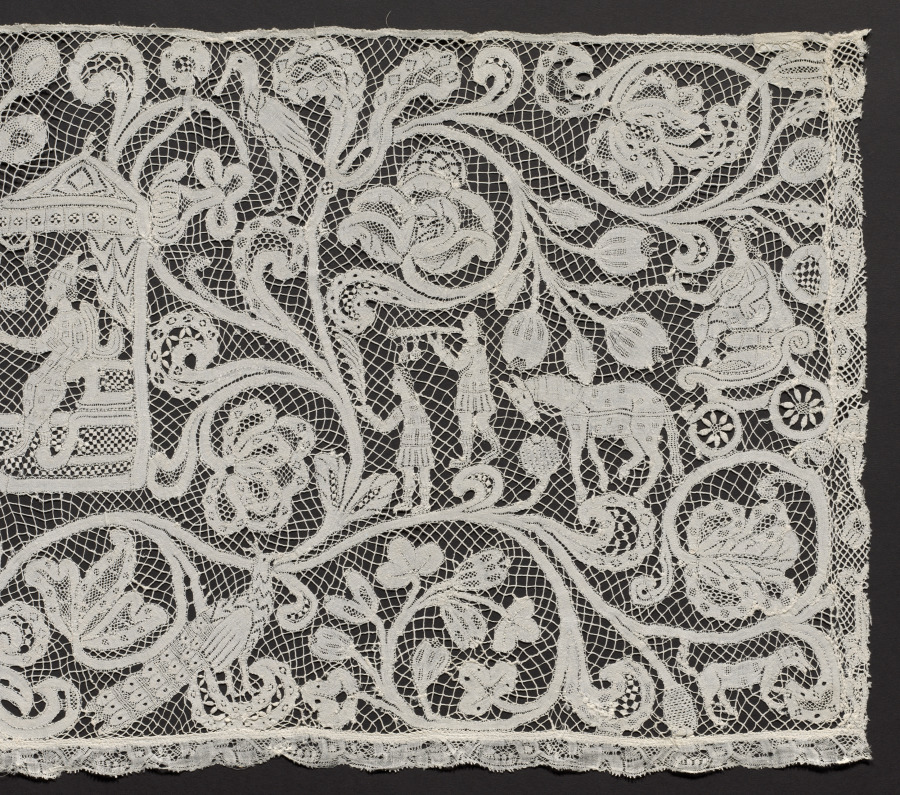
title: Lace Flounce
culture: Italy, Milan(?)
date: 1750–99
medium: Linen: bobbin lace (Punto di Milano)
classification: Lace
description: Being the most prestigious material, lace was used extensively by the 1600s for altar linen and for trimming priest’s albs, often incorporating finely rendered religious images amid blossoming vines. This alb flounce depicts scenes from the Old Testament story of Joseph, whose jealous brothers sold him to a caravan bound for Egypt. Joseph later interpreted dreams of the pharaoh, who made him ruler. When famine in Canaan caused Joseph’s ten brothers to travel to Egypt in search of food, they bowed down to him. After he revealed his identity, he forgave his brothers and God saved the family.